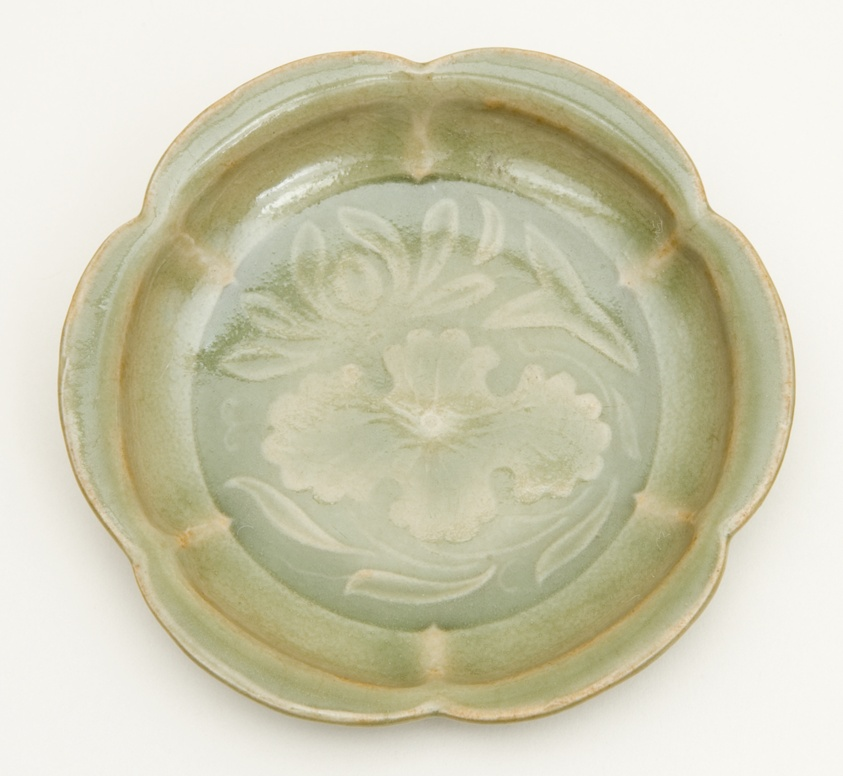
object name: Vessel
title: Dish with Petal-Lobed Rim, Lotus, and Waterweeds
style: Chinese (culture or style)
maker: China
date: Northern Song dynasty (960–1127), 11th/12th century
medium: Yaozhou ware; stoneware with underglaze molded decoration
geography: China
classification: dish (vessel); vessel